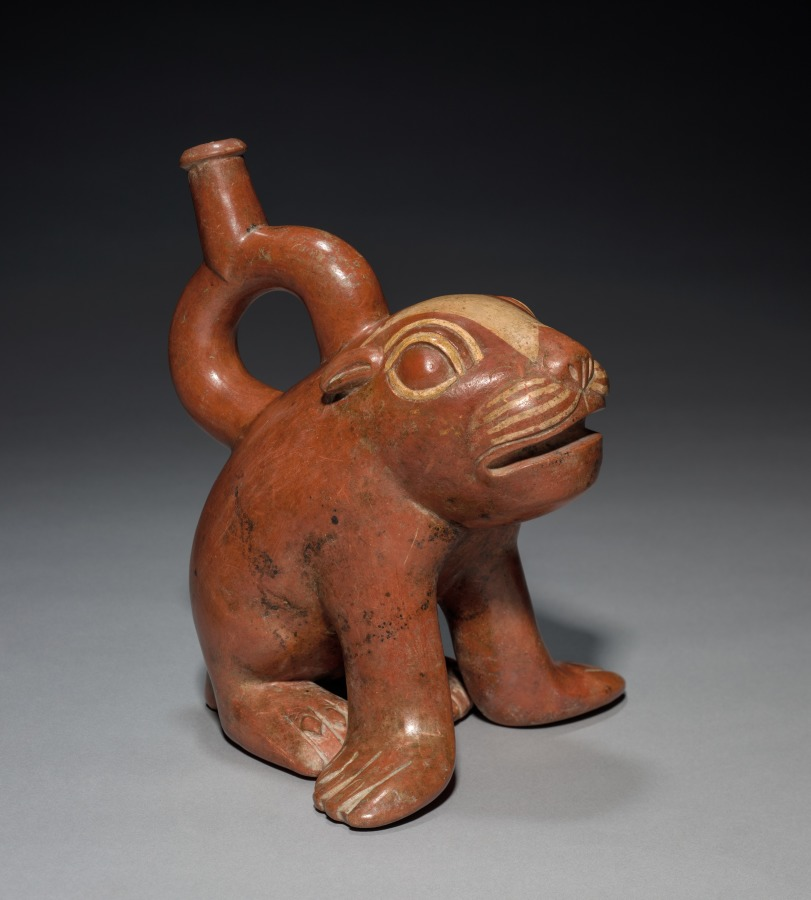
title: Sea Lion Pup Vessel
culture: Central Andes, North Coast, Moche people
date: 200–850 CE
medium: ceramic and slip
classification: Ceramic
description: Sea lions commonly appear in Moche art as effigy vessels, like this appealing pup, or in complex scenes that often show them as the targets of human hunters. They may have been prized in part for the beach pebbles found in their stomachs; modern Peruvian folk healers consider such pebbles to have powerful medicinal qualities. Also, colonial-period natives believed that sea lions carried the dead to off-shore islands, an idea that could date to Moche times.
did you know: Moche potters were skilled at producing charming images using only red and white slip.